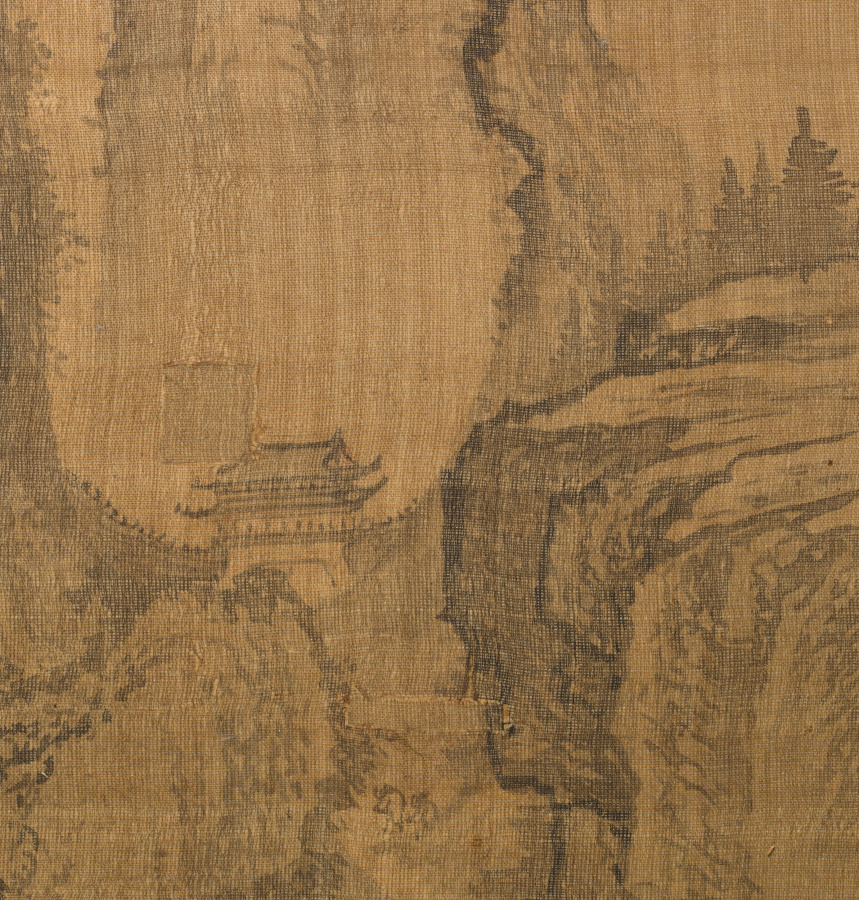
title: Mountain Market, Clear with Rising Mist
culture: Korea, Joseon dynasty (1392–1910)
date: early 1500s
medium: Hanging scroll; ink on silk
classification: Painting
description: This painting depicts several vignettes of the scholar-hermit’s various activities. In the lower left corner, the scholar-hermit is portrayed welcoming his guest in the courtyard. In the middle section on the lower bottom, the scholar and his guest are shown encountering another traveler on the bridge and exchanging their greetings. After crossing the bridge, the scholar visits a friend who lives in a compound of multiple buildings. The two friends decide to take a short walk. Both appear in a terraced cliff, enjoying a mountain vista and the fragrance of an old pine tree carried by the gentle wind. The scholar continues his journey with his two servants. They are portrayed crossing a winding wooden bridge. Right beyond the colossal rocky mountain, a panoramic view to a bustling market place unfolds, suggesting that it may be the place where the scholar-hermit’s entourage would visit. Perhaps the scholar need to buy items such as books, rolls of papers, and brushes, all essential to scholarly life. Toward the upper left corner, another group of travelers is landing on the river bank that leads to the city gate; they may be headed to the multistoried Buddhist stupa nestled on the top of the mountains.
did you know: Due to its stylistic features, this painting has long been believed to be a Chinese painting of the Northern Song period, dated to the 12th century.